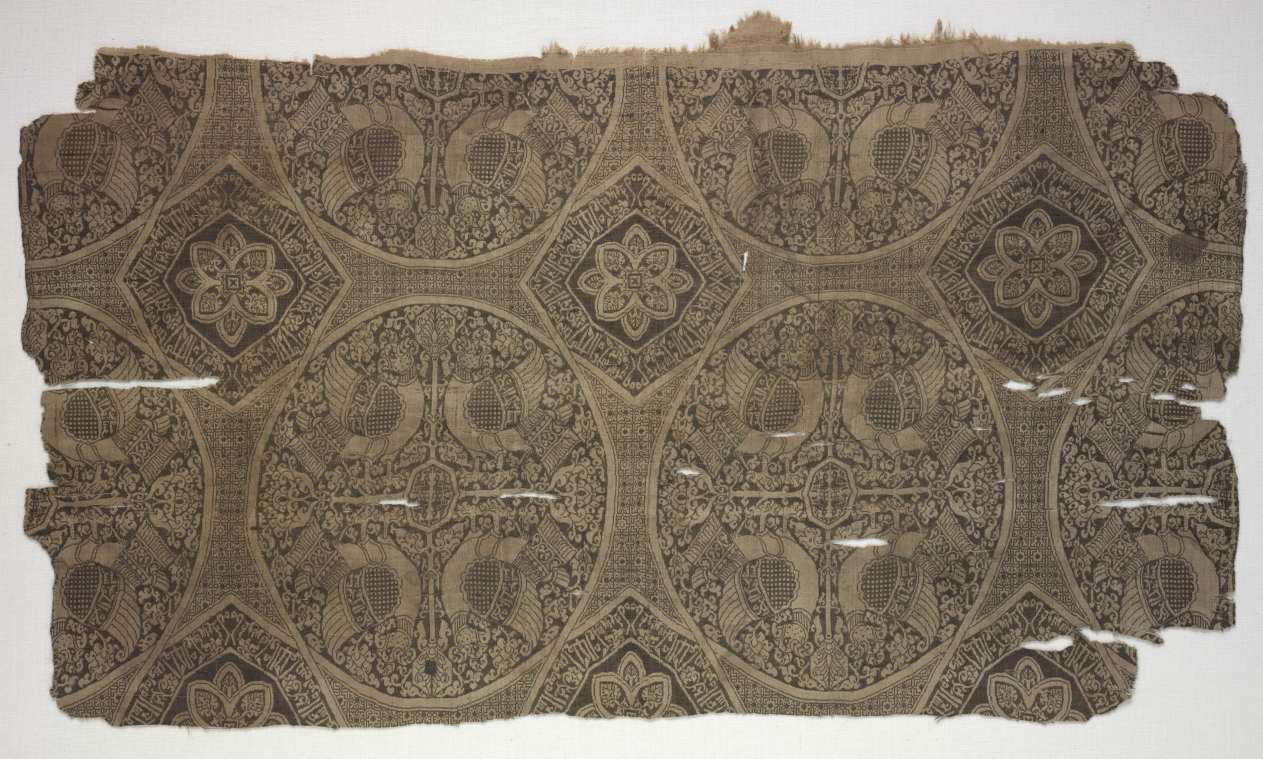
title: Fragment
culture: Iran or Iraq, in the style of the Buyid period (945–1055) or Seljuq period (1037–1194)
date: before 1975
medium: Silk: lampas weave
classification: Textile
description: This silk was originally reported to be one of several fragments from garments, shroud, and tomb covers unearthed during the early 1900s at Bibi Shahr Banu outside the ancient city of Rayy, a few miles from Tehran. The fragment preserves a beginning (or finishing) edge at the bottom and a small portion of selvage along the left edge. The exceptionally beautiful design of this silk is filled with ornament. Even the spaces between the roundels containing birds and palmette trees and the octagons with inscriptions enclosing floral devices are ornamented with an intricate geometric pattern. Islamic art is, above all, decorative in accordance with Muhammed's dislike of representing living forms. In Iran, floral and animal motifs never ceased to be represented even after the Islamic invasion, but they were depicted in a highly ornamental fashion as seen here.